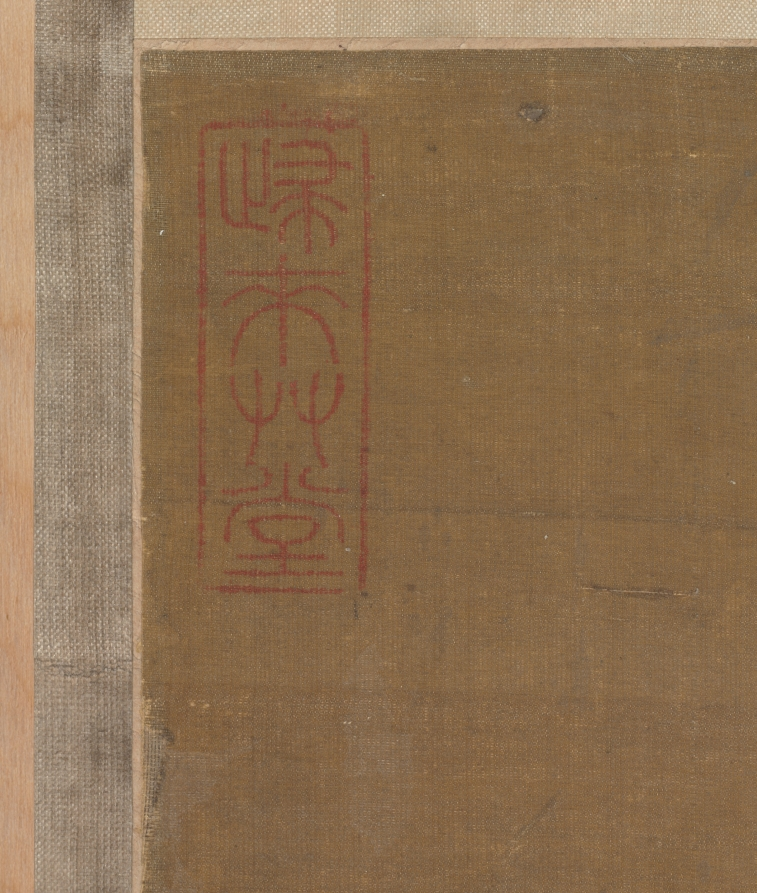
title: Xu Jingyang Moving His Family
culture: China, Ming dynasty (1368–1644)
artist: Cui Zizhong (Chinese, 1574–1644)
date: 1644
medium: Hanging scroll; ink and color on silk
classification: Painting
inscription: Artist's 2 seals: Pei-hai, Cui Zizhong yin.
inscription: 9 additional seals: 2 of Xiang Yuan (18th-19th c.); 1 of Tang Zuomei (late 18th-19th c.); 1 of Zhang Heng 張珩 (1915-1963); 1 of C. C. Wang 王季遷 (1907–2003); 4 unidentified.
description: Xu Jingyang was a dedicated fourth-century Confucian official who allegedly turned into a Daoist immortal. This scroll depicts the legend that when he attained immortality, he took his entire household, including chickens and dogs, to paradise. Cui Zizhong’s painting style intentionally referenced ancient masters. Typical of the pre-Song dynasty landscape tradition, there is the use of blue and green colors and an emphasis on outline rather than texture. While the trembling outlines are reminiscent of earlier painters, the flickering light on rocks and trees is a stylistic feature of Cui’s own time.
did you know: Xu Jingyang, wearing red, is in the upper register of figures, while below his servants transport a rooster, dog, and other supplies.